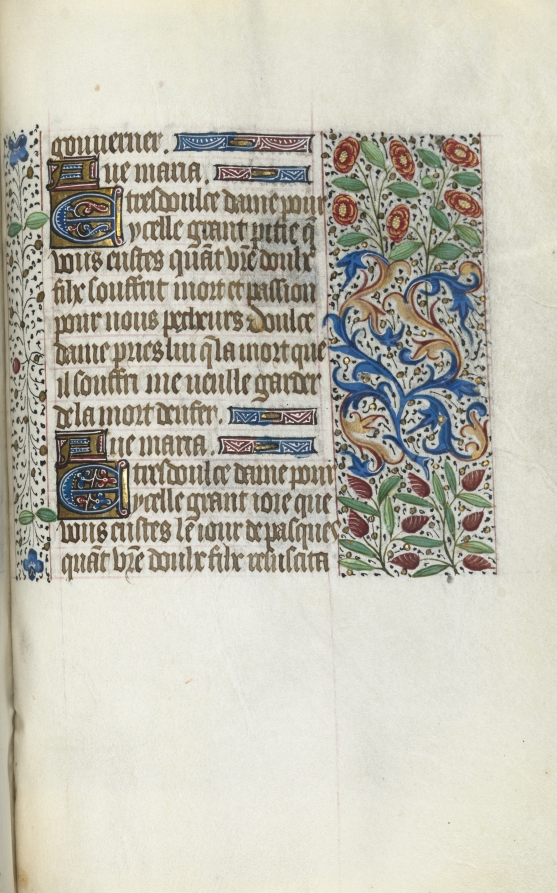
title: Book of Hours (Use of Rouen): fol. 150r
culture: France, Rouen, 15th century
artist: Master of the Geneva Latini (French, active Rouen, 1460–80)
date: c. 1470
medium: ink, tempera, and gold on vellum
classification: Bound Volume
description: In the late 1400s and early 1500s Rouen was an established and important center of book production. The city’s cathedral had a wealthy chapter that spent large sums of money to commission books and to maintain its extensive library. The stationers and booksellers would have likely been concentrated in or near the cathedral precinct. This artist, named after a manuscript now in Geneva, was Rouen’s principal illuminator during the second half of the 1400s.